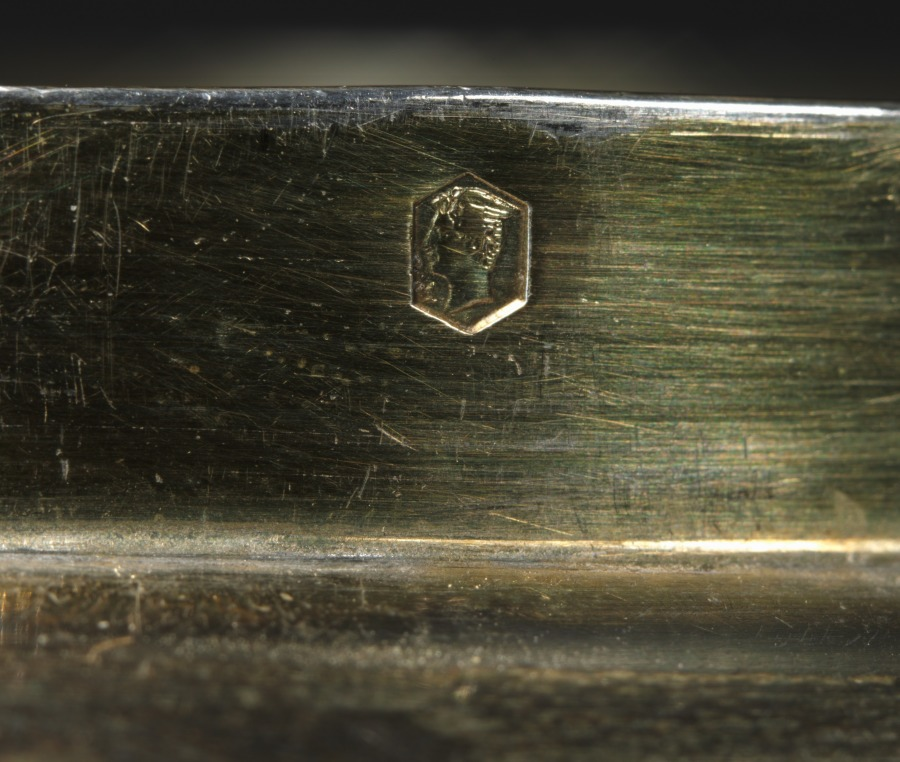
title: Monkey Figure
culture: Denmark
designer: Ingeborg Plockross-Iminger (Danish, 1872–1962)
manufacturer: Bing & Grøndahl (Danish, est. 1853)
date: c. 1900–1925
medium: porcelain, silver-gilt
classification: Sculpture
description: This figure featuring three monkeys was designed by the Danish ceramist Ingeborg Plockross-Iminger. The figure is displayed with a French silver mount that references Japonisme and Art Nouveau styles that were popular at the end of the 1800s and experienced a resurgence in the 1920s because of increased importation of Japanese goods to the West.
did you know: This ceramic figure usually stands alone, without a silver mounting.